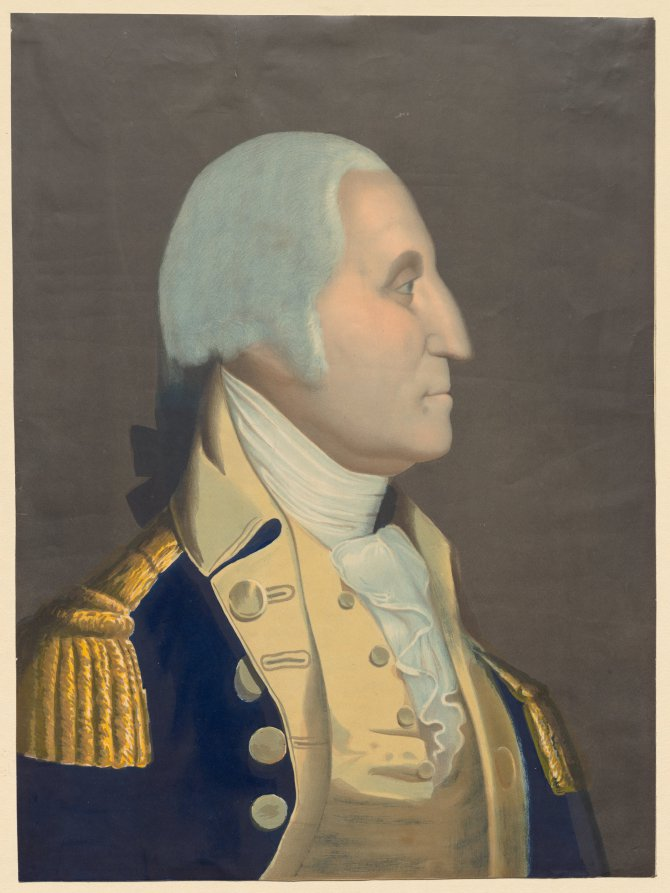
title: George Washington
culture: America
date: 1800s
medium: color lithograph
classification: Print